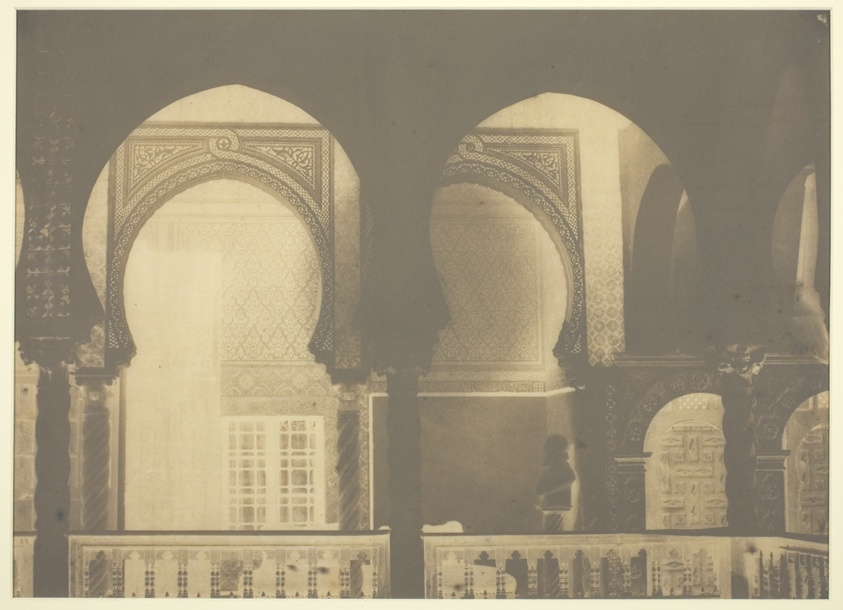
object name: Photograph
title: Palace Algeria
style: 19th century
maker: Gustave de Beaucorps (French, 1825–1906)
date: 1859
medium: Waxed paper negative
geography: France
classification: photography; waxed paper negative; negative; negative/transparency; photograph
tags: Paris, writing, photography, travel